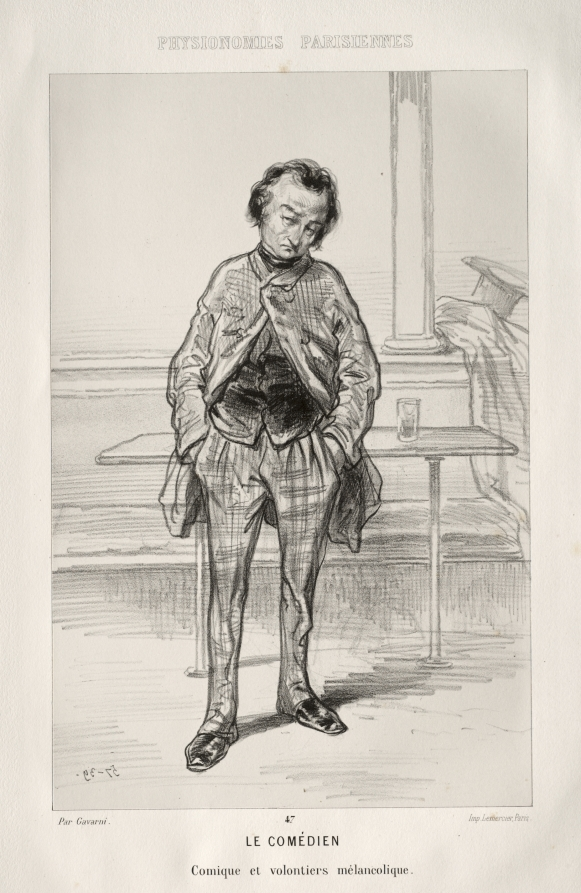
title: Le Comédien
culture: France, 19th century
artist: Paul Gavarni (French, 1804–1866)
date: c. 1858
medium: lithograph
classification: Print